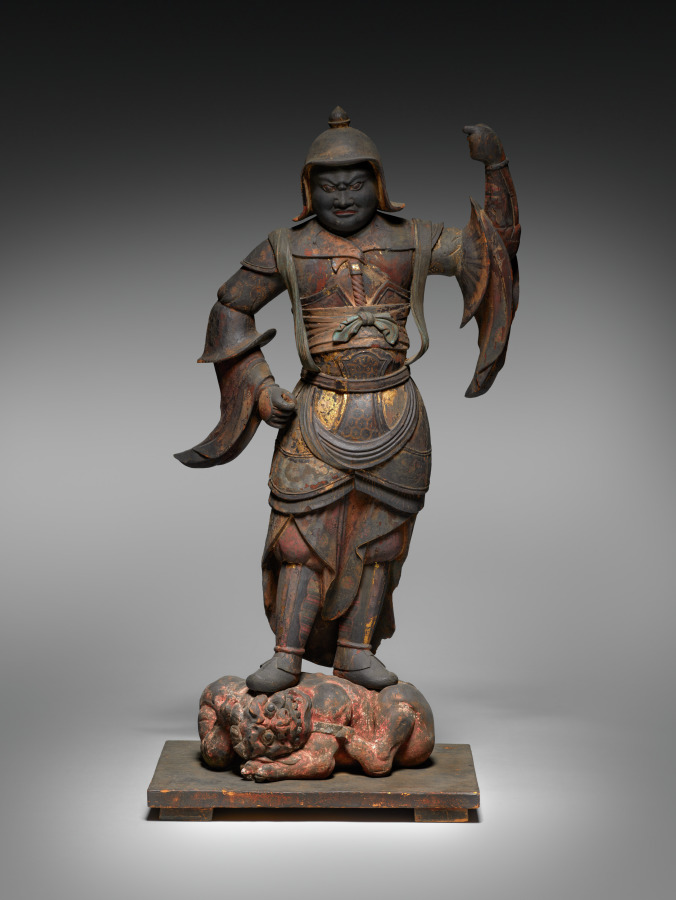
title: Guardian Figure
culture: Japan, Heian period (794–1185)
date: 1000s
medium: wood with polychromy and kirikane (cut-gold)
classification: Sculpture